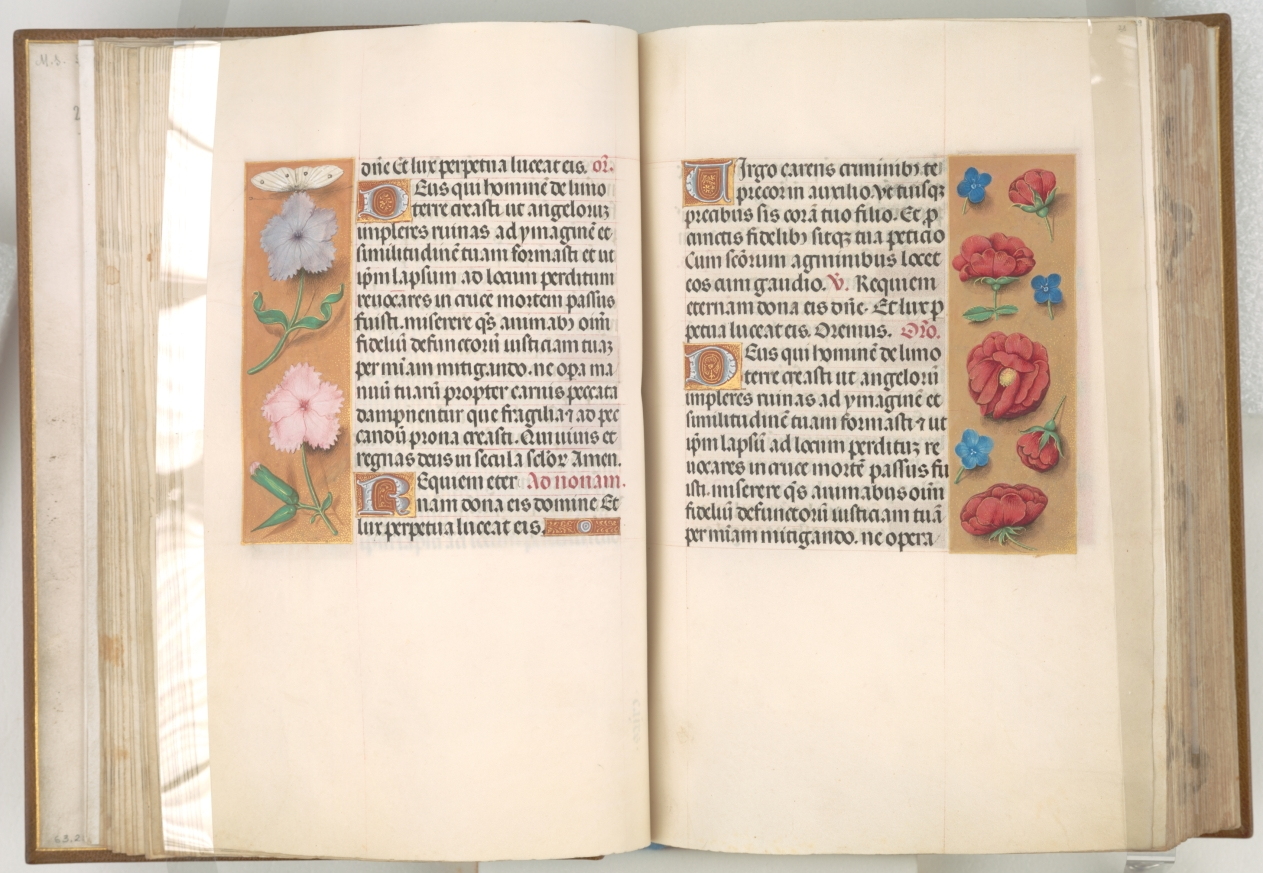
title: Hours of Queen Isabella the Catholic, Queen of Spain: Fol. 27v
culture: Flanders, Ghent and Bruges, late 15th century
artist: Master of the First Prayerbook of Maximillian (Flemish, c. 1444–1519)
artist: and Associates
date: c. 1500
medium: ink, tempera, and gold on vellum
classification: Bound Volume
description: A great lover of Flemish art, Queen Isabella treasured her many devotional books. This deluxe manuscript was created for her private devotions by highly organized and distinctly talented manuscript painters active in Ghent and Bruges. The Ghent-Bruges school represents the culmination of Flemish book painting, whose main features were the use of rich colors, illusionistic effects, a love of landscape, and a strong sense of visual narrative. Manuscripts produced by this circle of artists are renowned for their border decoration featuring a rich variety of realistically painted flowers, scrolling acanthus leaves, birds, and butterflies.